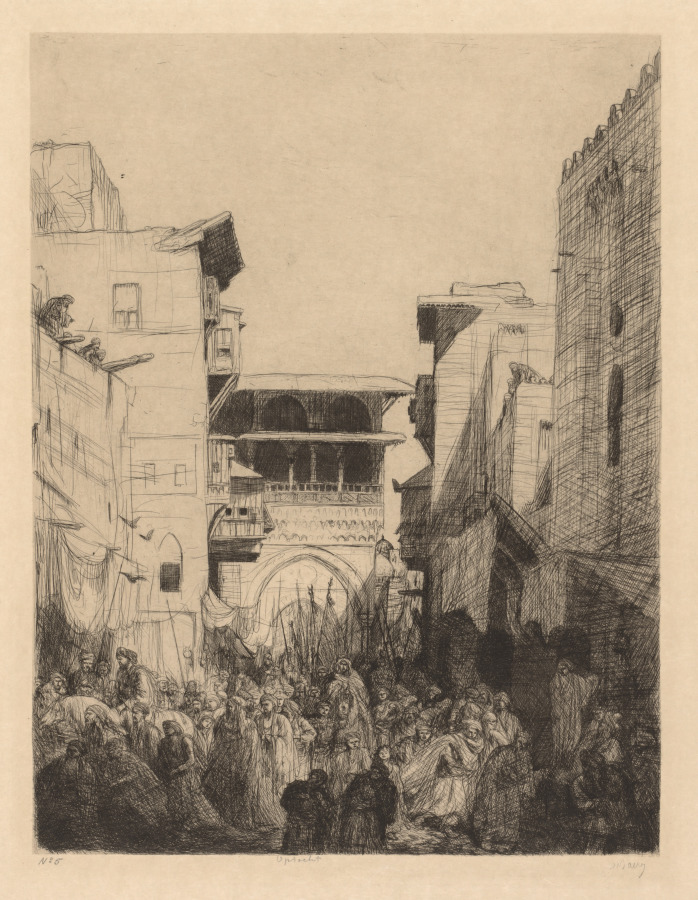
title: Street in Cairo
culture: Netherlands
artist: Marius Alexander Jacques Bauer (Dutch, 1867–1932)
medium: etching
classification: Print